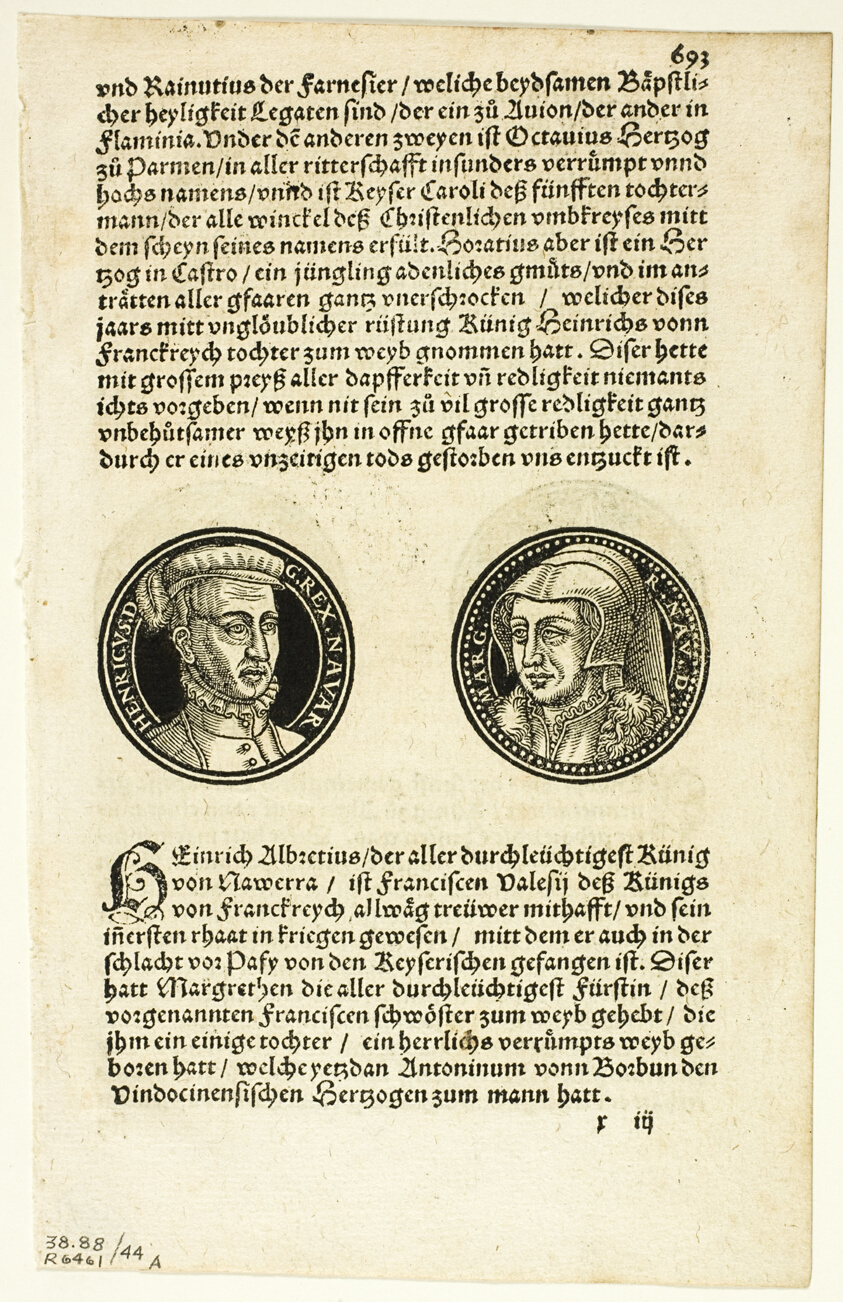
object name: Print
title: Medallion Portraits of Henry and Margaret of Navarre (recto) and Portraits of Barbarossa and of Muleasem of Tunis (verso) from Bildtnussen der Rhömischen Keyseren, plate 44 from Woodcuts from Books of the XVI Century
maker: Hans Rudolf Manuel Deutsch (Swiss, 1525-1572); assembled by Max Geisberg (Swiss, 1875-1943)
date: 1558, assembled into portfolio 1937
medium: Woodcut on paper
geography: Switzerland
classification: woodcut; print; prints and drawing